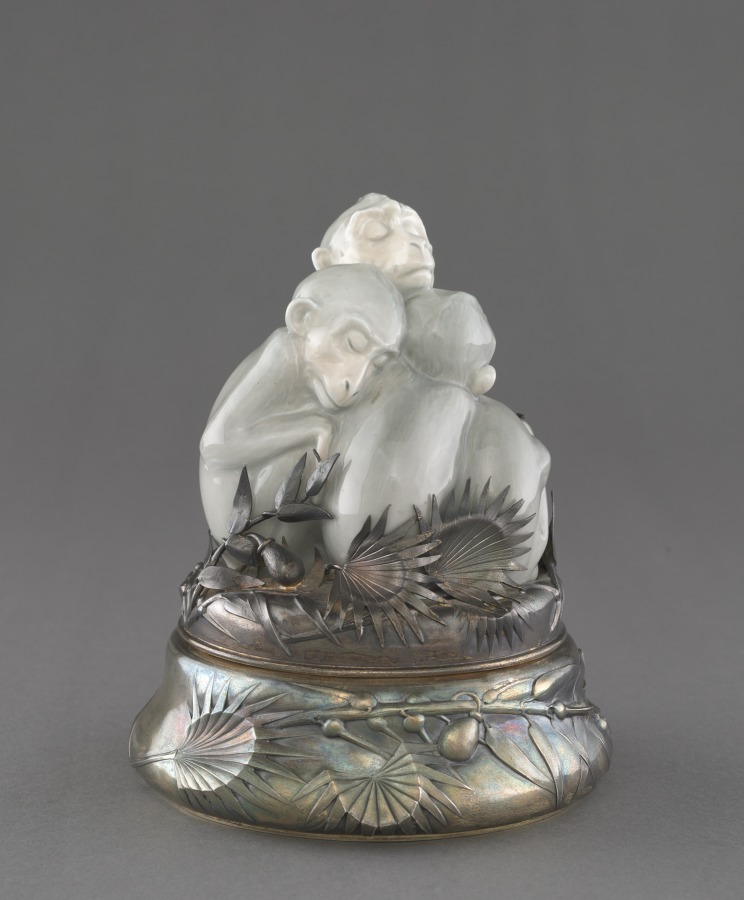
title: Monkey Figure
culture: Denmark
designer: Ingeborg Plockross-Iminger (Danish, 1872–1962)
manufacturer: Bing & Grøndahl (Danish, est. 1853)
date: c. 1900–1925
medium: porcelain, silver-gilt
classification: Sculpture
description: This figure featuring three monkeys was designed by the Danish ceramist Ingeborg Plockross-Iminger. The figure is displayed with a French silver mount that references Japonisme and Art Nouveau styles that were popular at the end of the 1800s and experienced a resurgence in the 1920s because of increased importation of Japanese goods to the West.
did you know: This ceramic figure usually stands alone, without a silver mounting.